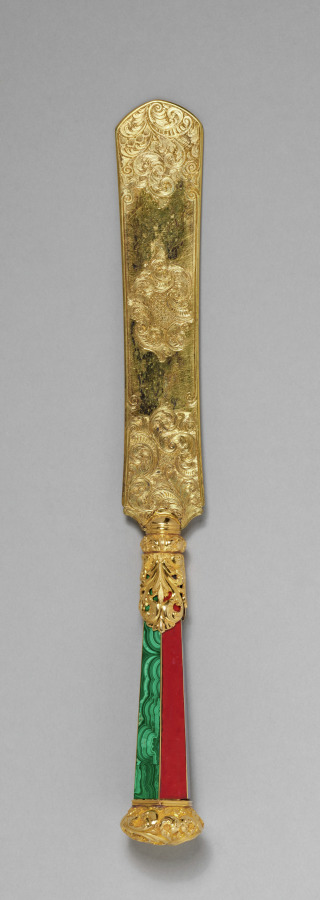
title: Paper Knife from a Writing Set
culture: England, mid-19th century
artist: John Hamilton Mortimer (British, 1740–1779)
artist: and Paul Storr (British, 1771–1844)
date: c. 1830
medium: hardstones including lapis lazuli, malachite, carnelian, agate, gold; original fitted velvet-lined case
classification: Miscellaneous